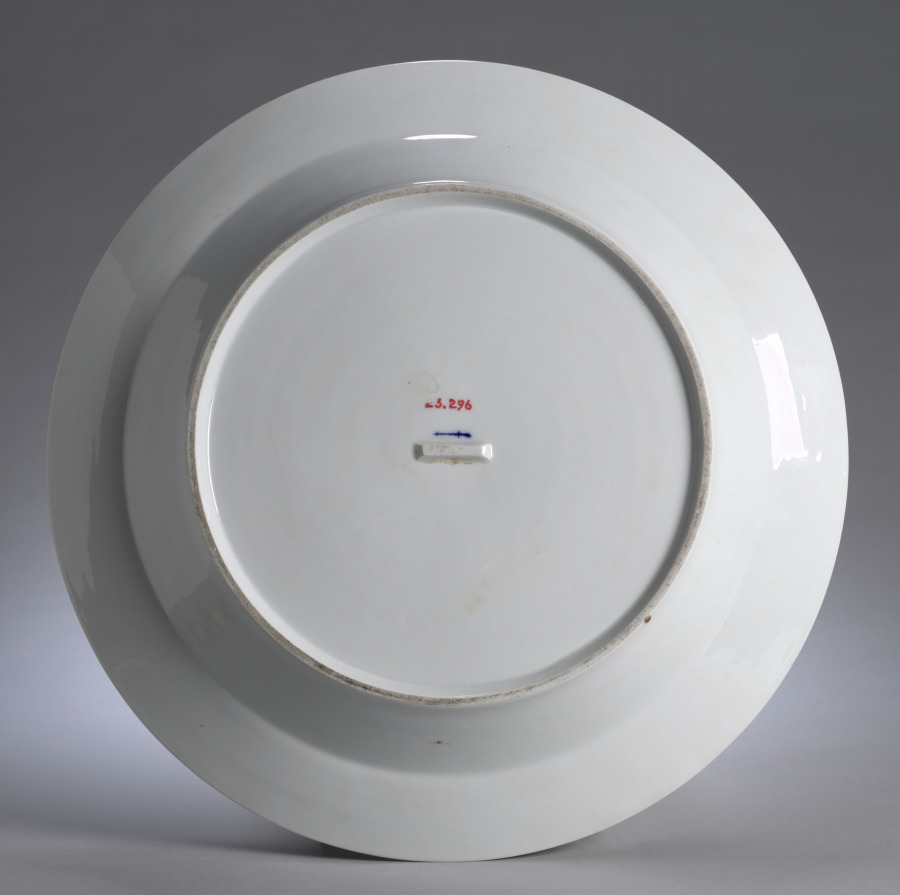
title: Platter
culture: Germany, Berlin, 18th century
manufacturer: Royal Porcelain Manufactory, Berlin (German)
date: 1763–1837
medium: porcelain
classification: Ceramic